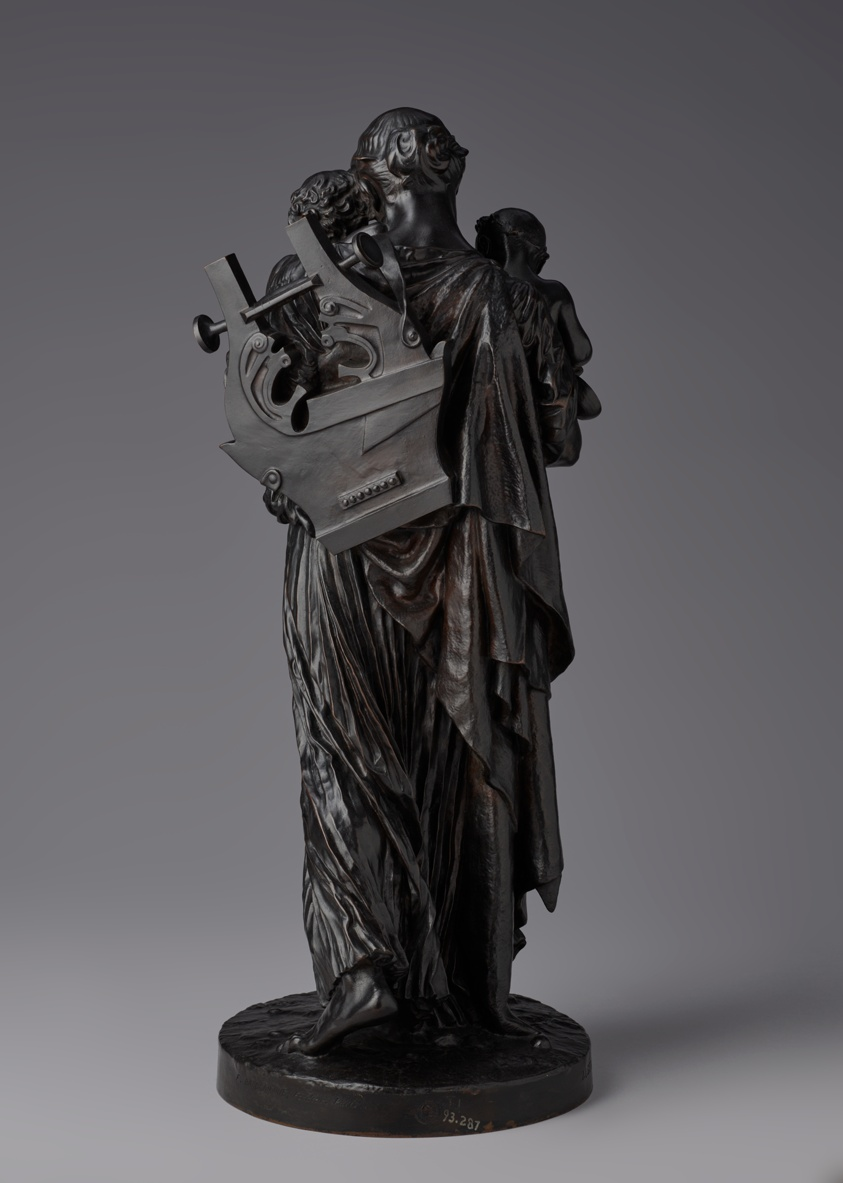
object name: Sculpture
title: Anacreon with the Infants Bacchus and Cupid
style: nineteenth century, 19th century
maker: Jean Léon Gérôme (French, 1824–1904)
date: Modeled 1878, cast c. 1893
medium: Bronze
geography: France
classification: statuette; sculpture; french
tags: mythological figures, men, children, gods (deities), mythology, cupids, man, babies, Greek gods, mythical